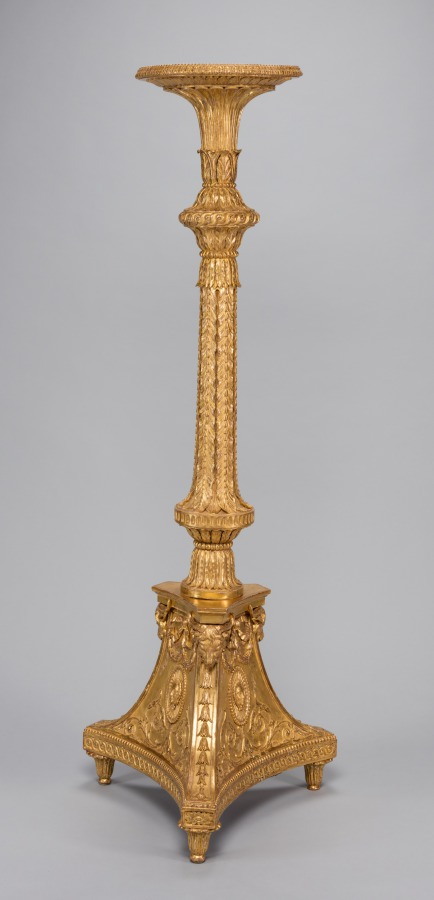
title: Candle Stand (torchère) (2 of 2)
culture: England, 18th century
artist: Thomas Chippendale (British, 1718–1779)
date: c. 1773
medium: Gilt-wood, gesso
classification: Furniture and woodwork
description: This gilded candle stand was made by Thomas Chippendale, the most renowned cabinetmaker in eighteenth-century London, for the grand drawing room of Brocket Hall, a large country house in Hertfordshire, England. With finely carved acanthus leaves, swags, fluting, and oval masks depicting the Roman goddess Diana, this candle stand exhibits Chippendale’s masterful understanding of neoclassical proportion, scale, and ornament. His landmark book of furniture designs, The Gentleman and Cabinet-Maker’s Director (first published in 1754), was highly admired as a source of inspiration by cabinetmakers and architects around England as well as in Europe and America.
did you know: Candle stands usually held silver or crystal candelabra that were lit for evening entertainment.